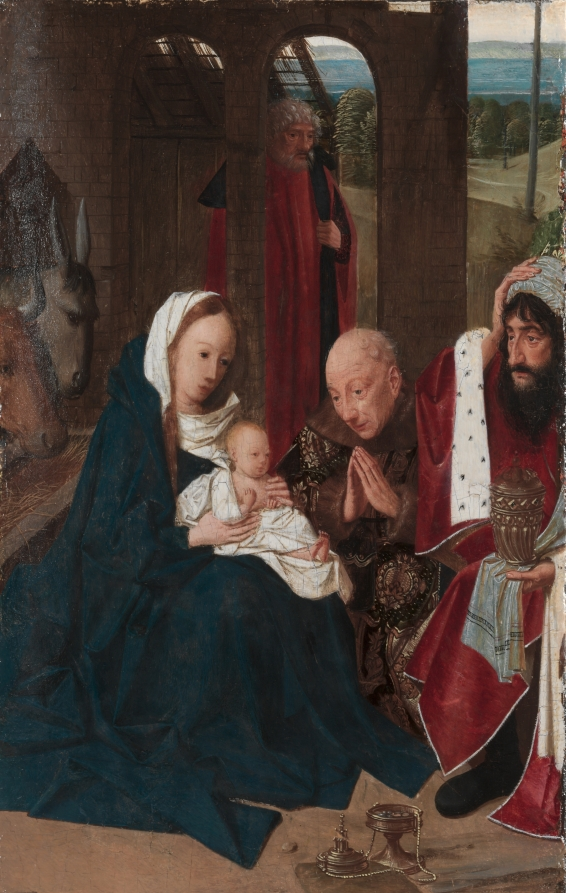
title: The Adoration of the Magi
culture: Netherlands, Haarlem, 15th century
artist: Geertgen tot Sint Jans (Netherlandish, c. 1460-c. 1490)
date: 1480s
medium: oil on wood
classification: Painting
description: Little is known about the life and career of Sint Jans. He seems to have been born in Haarlem in Holland in the northern Low Countries where he may have been attached to the Knights of Saint John as a lay brother, and likely produced an altarpiece for that order. (His name seems to derive from his affiliation with the Knights of Saint John.) He died young in his late 20s. Between 12 and 16 paintings are attributed to him. The subjects tend to derive from the New Testament. The original context of this painting is not known.